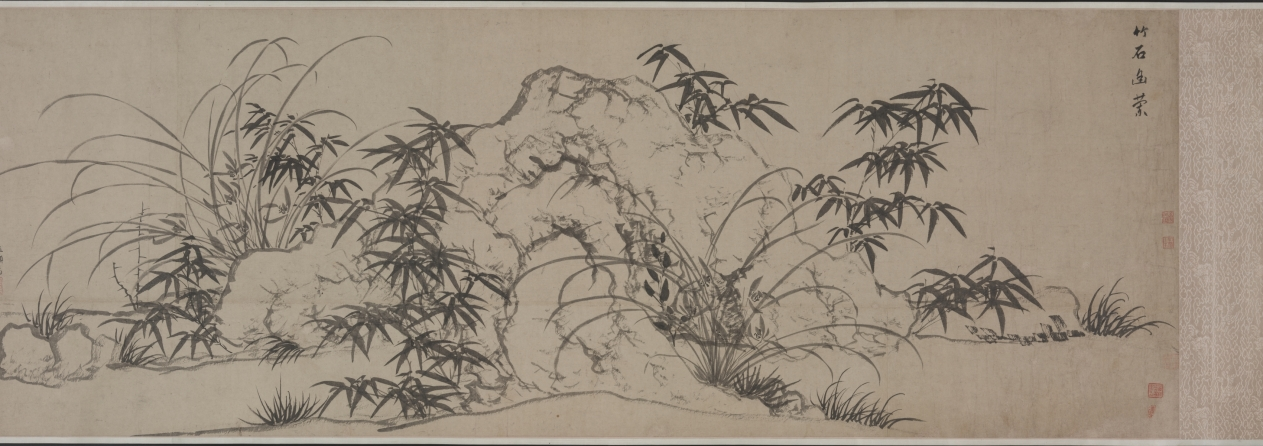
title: Bamboo, Rocks and Lonely Orchids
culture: China, Yuan dynasty (1271-1368)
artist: Zhao Mengfu (Chinese, 1254–1322)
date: 1271–1368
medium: Handscroll; ink on paper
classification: Painting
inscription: 竹石幽蘭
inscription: 孟頫為善夫寫. [印] 趙氏子昂; [印] 松雪齋; [印] 天水郡圖書印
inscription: 古人善書者必能畫點墨作蠅，便自有生意。松雪翁蘭石草聖飛帛筆法皆具，可寶也。安陽韓性 [印]明善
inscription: Colophon 2. Qiu Yuan 仇遠 (1247-after 1328), a respected poet during the Song and Yuan periods. He was linked to, among others, Zhao Mengfu and Gao Kegong. Zhao Mengfu painted a version of Nine Songs 九歌圖 for him, and Gao Kegong dedicated to him a painting titled Mountain Village 山村圖 (current whereabouts unknown). His poem here is also preserved in his collected works.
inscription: Colophon 3. Zheng Yuanyou 鄭元祐 (1292-1364), an erudite scholar and teacher of renown, active in Hangzhou and Suzhou. In the 1350s, when Gu Ying’s literary gatherings were at their peak, he was already elderly and participated in a limited way.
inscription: Colophon 4. Wu Kegong 吳克恭 (active mid-1300s), a friend of Gu Ying and Ni Zan 倪瓚 (1301–1374), a major Yuan painter.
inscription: Colophon 5. Angji 昻吉 (jinshi of 1348), of Western Xia 西夏 origin and a poet of distinction. He wrote an introduction to the painting Literary Gathering at Yushan 玉山雅集圖, of which Zhang Wo was the painter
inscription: Sheet 2. Yuan: friends of Gu Ying Colophon 6. Wang Zifang 王孜方 (active mid-1300s), an official who, at the time of his visits to Gu Ying’s estate, had reached the rank of Minister. He is better known under the name Wang Keju 王可矩.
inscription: Colophon 7. Ke Jiusi 柯九思 (1290–1343), a major official who served in the Kuizhang Pavilion 奎章閣 and as an advisor to Emperor Wenzong in matters of calligraphy and painting.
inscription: Colophon 8. Yu Li 于立 (active mid-1300s), a Daoist recluse, poet, and close friend of Gu Ying, so much so that during his visit to Gu Ying’s estate he was given accommodation in a special pavilion. His poem here is also preserved in Gu Ying’s Cao tang ya ji.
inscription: 至正十一年十月廿八日男奕百拜堇觀 [印] 趙奕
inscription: Colophon 10. Yu Ji 虞集 (1272-1398), a major official and literary figure who also served in the Kuizhang Ge. His poem is recorded in his collected works. The poem is one of a set of four inscribed at the request of Wang Huayu 汪華玉 on Orchids and Rock 蘭石圖 by Zhao Mengfu, obviously a different, long lost, painting. Wang Huayu was an official and a collector (jinshi of 1327). Yu Ji’s colophon here was written before 1348 and during his retirement in Linchuan 臨川, Jiangxi, possibly sent from there. It is possible he had not seen the painting, and his calligraphy here appears to be rather casual and detached, jotting down an old poem without much care, contrary to his earlier practice.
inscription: Colophon 11. Sun Shi 孫時 (mid-1300s–early 1400s), a native of Yuncheng 鄆城, Shandong, and a jinshi of 1390. He may have been quite young when paying a visit to the Yushan gatherings in the late 1340s and early 1350s.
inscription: Colophon 12. Zhang Zhu 張翥 (1287–1368), Qiu Yuan’s disciple and a poet of renown, who enjoyed a belated career in officialdom and was known for his integrity.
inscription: Sheet 4. Yuan and Ming: further friends of Gu Ying; colophon 17 begins the early Ming sequence. Colophon 13. Zhang Wo 張渥 (active c. 1336-after 1364), a frustrated scholar, a poet, and a painter of landscape and figures. An active participant in Gu Ying’s literary circle, he painted the Literary Gathering at Yushan, a pictorial document of the individuals and activities on Gu Ying’s estate. His rendering of Nine Songs is well known, and one version is in the collection of the Cleveland Museum of Art (see 1959.138). His poem here is also found in Gu Ying’s Cao tang ya ji, under the entry “ti Zhao Hanlin mo lan 題趙翰林墨蘭” (inscribed on the Ink Orchid by Zhao the Hanlin academician). This is a rare instance of calligraphy as well as signature by the artist.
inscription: 觀吳興公竹石幽蘭圖使人鄙吝頓消。其筆勢從橫天真爛澷，一出於二王書法。冝仲瑛寳而玩之異於常品也。至正八年十月天台陳基書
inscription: Colophon 15. Zhang Shen 張紳 (active about 1340–after 1385), a respected calligrapher and participant in Gu Ying’s literary gathering. He resided in Kunshan, the same city where Gu Ying’s estate lies. In the third line of the poem, he mentioned Gu Ying’s hao, “Jinsu 金粟.” This was a name he assumed later in life, after the death of his mother in the year 1356. Thus this inscription must have been written after that date.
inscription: Colophon 16. Wang Sun 汪遜 (active mid-14th century), a little-known native of Kuaiji 會稽, who may have been one of the infrequent visitors to Gu Ying’s estate.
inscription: Colophon 17. Hu Guang 胡廣 (1370-1418) is the first Ming colophon writer on this scroll. He was an official of great power in the court and a trusted advisor of Emperor Chengzu; he served as the Grand Academician of the Hall of Literary Profundity 文淵閣大學士 and Grand Academician of the Left Secretariat of the Heir-Apparent 左春坊大學士.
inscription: Sheet 5. Early Ming Colophon 18. Wang Yinshi 王尹實 (active about 1403–about 1424), a native of Siming 四明, Zhejiang, and a minor official and calligrapher.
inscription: Colophon 19. Zhang Yuchu (signed here as “Wuwei 無 為”), the forty-third Heavenly Master of the Zhengyi sect of Daoism. A man of erudition, he was also a poet, painter, and calligrapher. A modified version of the poem here was published in his collected works titled Xian quan ji 峴泉集. A slight modification in the first line is the only change: “Wu xing miao yao nian bing xue zi 吳興玅年氷雪姿.”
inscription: Colophon 20. Yao Guangxiao 姚廣孝 (1335-1418), a Buddhist monk, scholar, and counselor to Chengzu in his successful attempt at usurpation of the throne. Yao Guangxiao was a controversial figure but wielded enormous power.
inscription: Sheet 6. Wang Ning alone Colophon 21. Wang Ning 王寧 (d. 1411) signed as “Qingzhen 清真” in this colophon. One of the three seals reveals his identity as the Yongchun Hou 永春侯 [Marquis of Lasting Spring] (appointed 1402), and the husband of Princess Huaiqing 懷慶公主 (1328-1398), the sixth daughter of the founder of the Ming dynasty, Zhu Yuanzhang. This colophon postdates 1402.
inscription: Sheet 7. Mid-Ming Colophon 22. Ou Yi’an 區易安 (active first half of 15th century), unknown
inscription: Colophon 23. Chen Lian 陳璉 (1370-1454), a native of Dongguan 東莞, Guangdong 廣東, and an official admired for his erudition and perspicacity. In view to the known calligraphic style of Chen Lian, this colophon appears to be a transcription and not written by him.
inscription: Colophon 24. Wei Ji 魏驥 (1374-1471) enjoyed longevity (he lived to the age of ninety-eight) and an extended length of service as an official. A jinshi of 1406, he eventually became the Minister of Personnel in Nanjing 南京吏部尚書. The colophon here is dated 1434, when he was invited to view the painting by the Court Musician Mo Zhizhong 莫至翀, its owner. Again, in view of its calligraphic style, this was not written by him, but is a transcription from the original.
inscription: Colophon 25: Zhang Yi 章鎰 (active 1462-1473), a Ningbo native and an official with a reputation for courage and integrity.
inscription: Sheet 8. Further mid-Ming Colophon 26. Yin Zhi 尹直 (1427-1511), a controversial figure in Ming politics in spite of his erudition and high position as the Minister of War 兵部尚書.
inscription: Colophon 27. Zou Yu 鄒虞 (active 1460-1520; jinshi of 1490), a native of Hangzhou. In 1510, he was appointed Administrative Vice Commissioner in Guangdong.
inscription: Sheet 9. Xu Shouhe 徐守和 alone Colophon 28. Xu Shouhe 徐守和 dated his entry in 1629. Since he wrote it in his own studio, The Lesser Qingbi Pavilion 小清閟, he was likely the owner of the scroll. Xu’s life is not well documented; he was a connoisseur of note during the last years of the Ming dynasty rule. He may have acquired the Cleveland scroll from Wu Ting, whose seals appear here.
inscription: Sheet 10. The mounter’s note. Xu Shudong 徐曙東 of Jiaxing 嘉興 made the remounting on the first day of sixth month, 1802.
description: Bamboo and orchids are motifs associated with the virtues of the scholar-official. Bamboo that bends but does not break stands for moral integrity, endurance, and loyalty. Wild, fragrant orchids that bloom in the shadow symbolize modesty and the aura of learnedness. Rocks are often considered to be miniature versions of mountains that form the universe. This monochrome ink painting is brushed on paper in a masterfully calligraphic manner. While the rocks are delineated in chalky, dry strokes showing the effect of flying white (feibai), the bamboo and orchids are drawn with a swift brush demonstrating the virtuosity of the artist.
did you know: One of the many inscriptions records that the handscroll was last remounted by Xu Shudong 徐曙東 of Jiaxing 嘉興 in 1802.